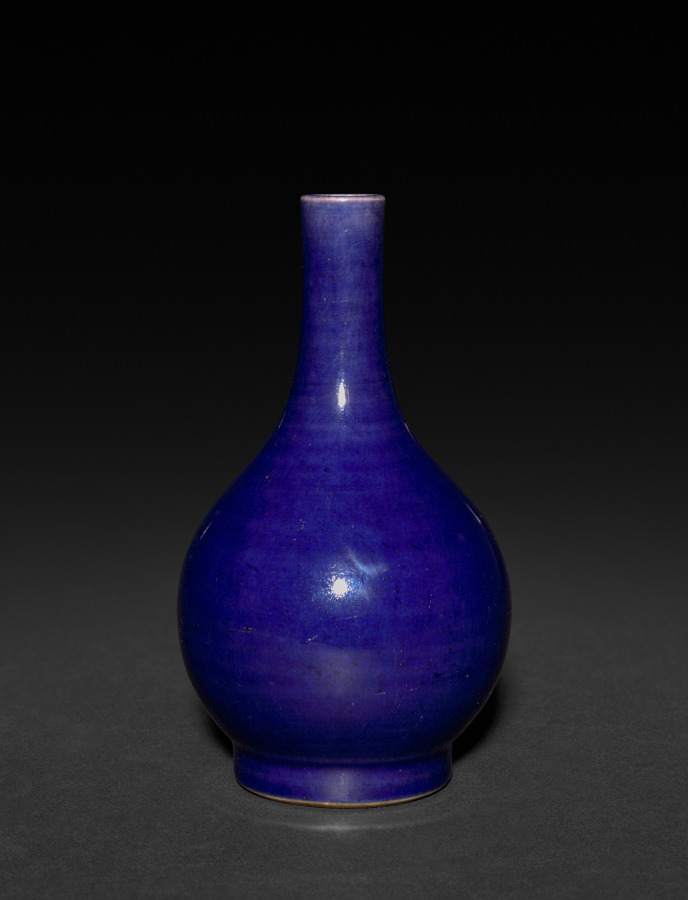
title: Bottle-Shaped Vase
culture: China, Qing dynasty (1644–1911), Qianlong reign (1736–95)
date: 1736–95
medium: porcelain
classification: Ceramic